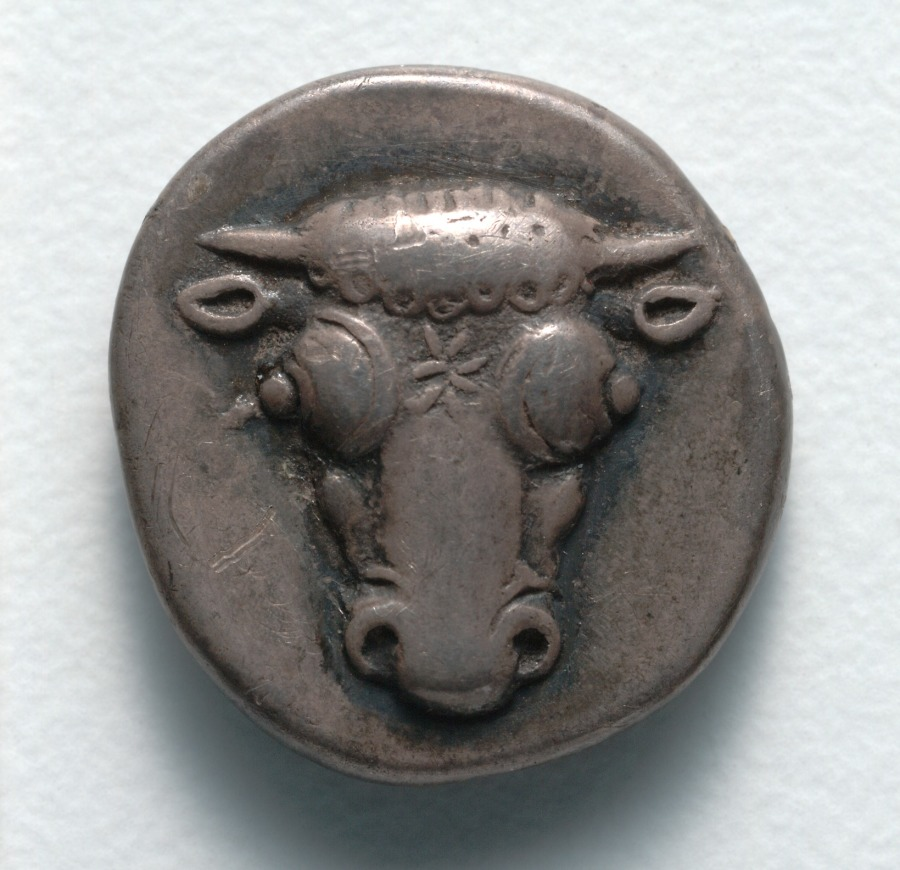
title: Hemidrachm: Bull's Head (obverse); Head of Artemis (reverse)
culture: Greek, probably minted at Phokikon (Phokis)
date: c. 485–480 BCE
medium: silver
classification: Coins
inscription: Φ[OK]I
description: The head of a bull, its characteristic star-like fur and bulbous eyes particularly noticeable, dominates the obverse of this coin. On the reverse is Artemis, whose hair is curled back in the krobylos style using a hairnet. The unusual lines above Artemis’s nose and below her chin suggest that the reverse may have been struck with the same design twice.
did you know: The punches in Artemis’s neck were probably made to check the metal quality.